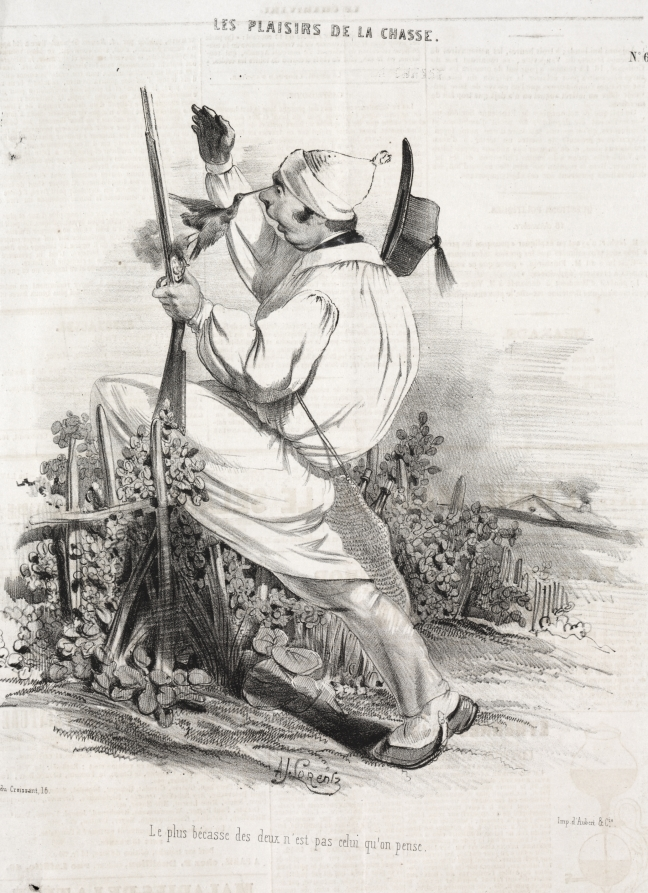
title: Les Plaisirs de la chasse: Le plus bécasse des deux n'est pas celui qu'on pense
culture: France, 19th century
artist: Alade Joseph Lorentz (French, 1813-after 1858)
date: 1842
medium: lithograph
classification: Print